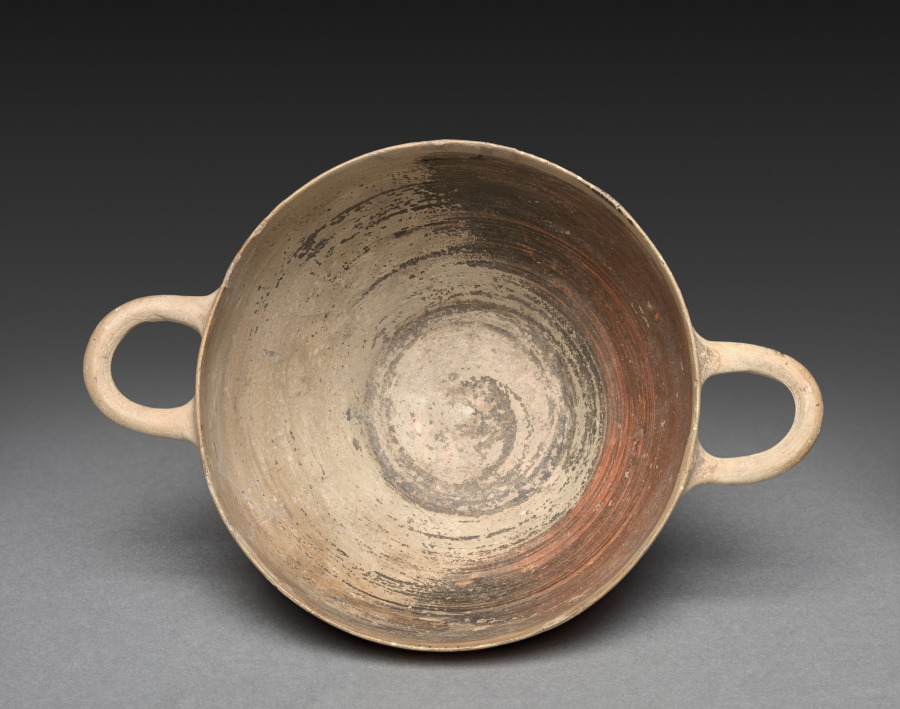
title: Black-Figure Kotyle (Drinking Cup)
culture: Greek, Corinthian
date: 500s BCE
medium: ceramic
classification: Ceramic